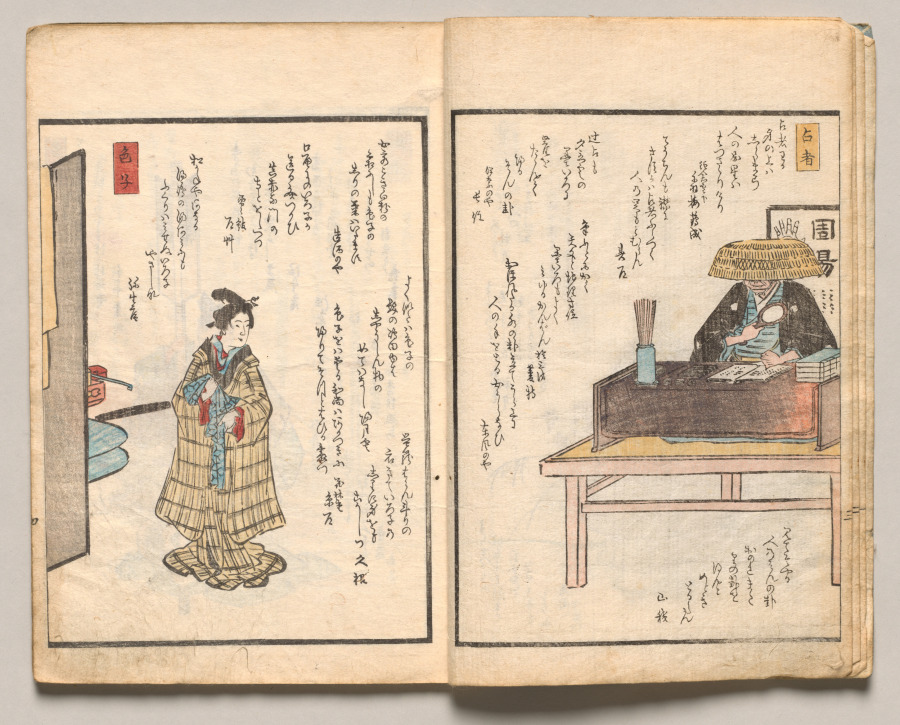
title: Spread Four from Volume Two of People of Japan in Light Verse (Kyōka)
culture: Japan, Edo period (1615–1868)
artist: Utagawa Hiroshige (Japanese, 1797–1858)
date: 1857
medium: Woodblock-printed book; ink and color on paper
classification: Bound Volume